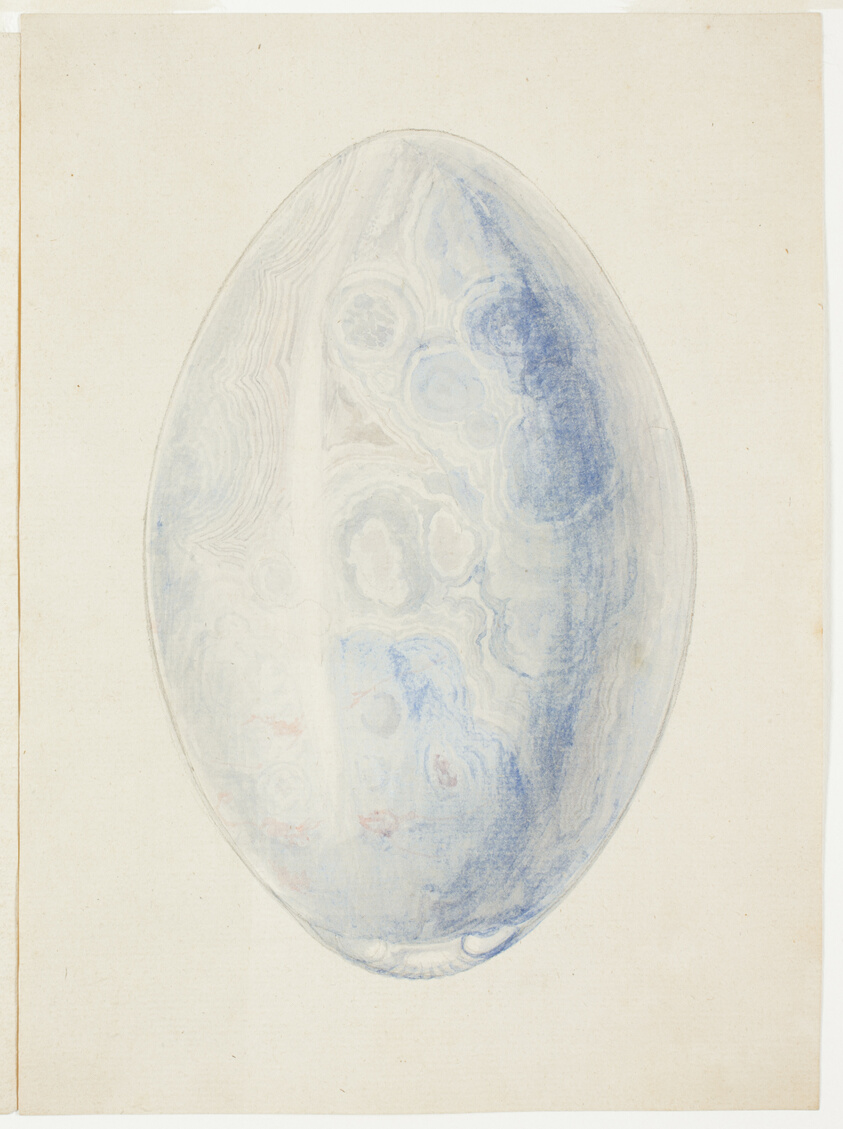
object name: Drawing and Watercolor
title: Overview of Oval Shell Stone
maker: Giuseppe Grisoni (Italian, born Flanders, 1699-1769)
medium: Gouache over black chalk, on ivory laid paper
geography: Flanders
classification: gouache; watercolor; drawings (visual works); prints and drawing